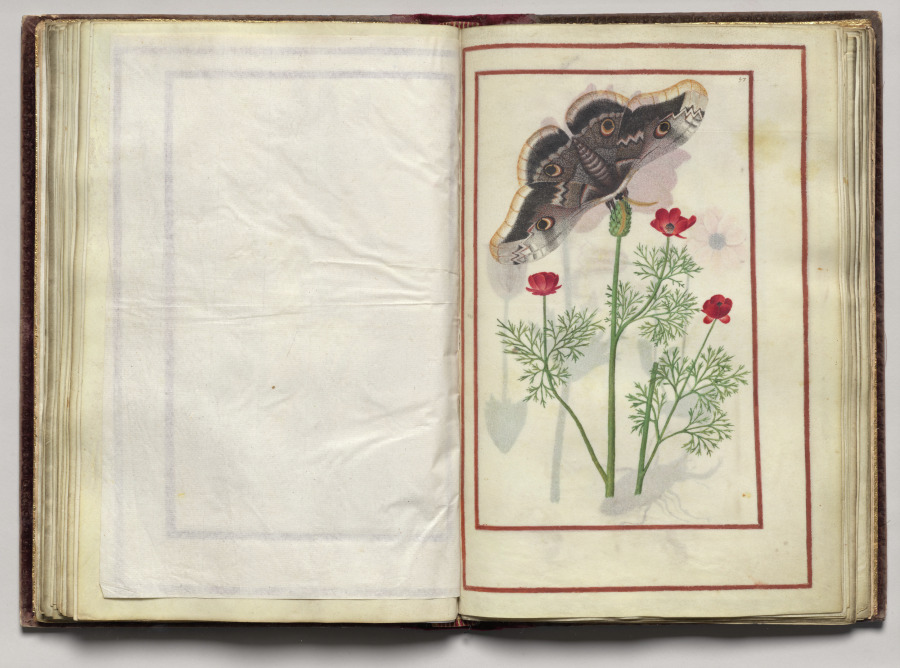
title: Moth with Poppies?, folio 29 (recto), from Florilegium (A Book of Flower Studies)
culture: France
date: 1608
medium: watercolor, ink, silver, and gold over occasional traces of pencil, on vellum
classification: Bound Volume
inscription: Dated: Poitiers 1608 (on frontispiece) Signed: On frontispiece in black ink, lower right: Van Kuyk Notation on drawing: Frontispiece: in pencil, lower margin: * élève de Van Kessel, peintre flammand (* in pencil also appears in front of Van Kuyk's name).